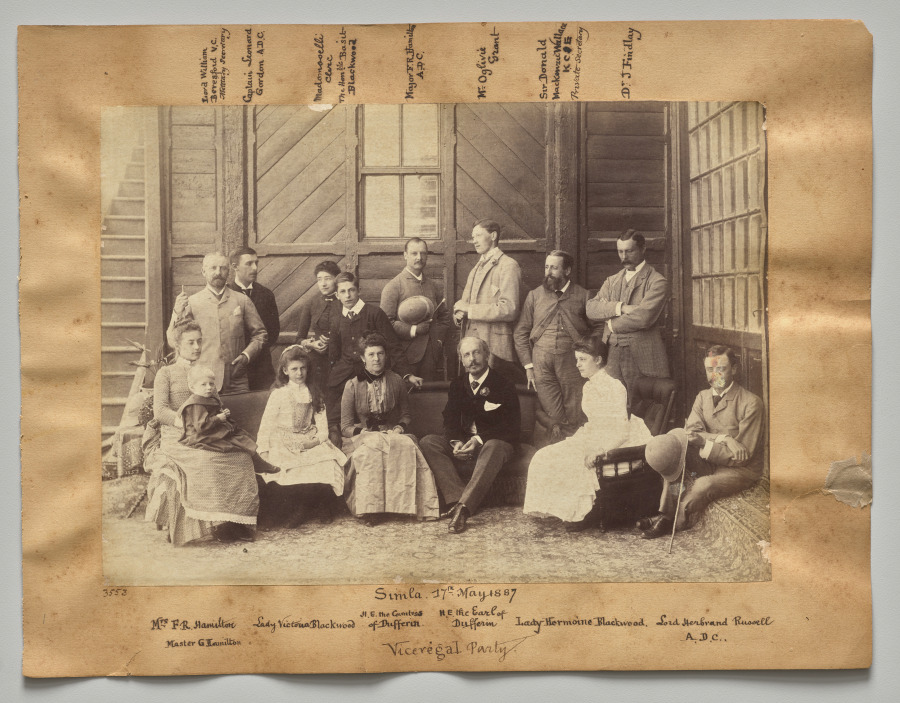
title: Shimla 17th May 1887: Viceregal party. Lord William Beresford, Military Secretary, Captain Leonard Gordon A.D.C., Mademoiselle Clerc, The Honorable Basit Blackwood, Major F. R. Hamilton A.D.C., Mr. Oglivie Grant, Sir Donald Mackenzie Wallace K.C.E., Private Secretary, Dr. J. Findlay, Mrs. F. R. Hamilton, Master G. Hamilton, Lady Victoria Blackwood, H. E. The Countess of Dufferin, H. E. The Earl of Dufferin, Lady Hermione Blackwood, Lord Herbrand Russell, A.D.C. (recto)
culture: India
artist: Raja Deen Dayal (Indian, 1844–1905)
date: 1887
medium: albumen print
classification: Photograph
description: These photographs are part of an album, now disassembled, of around 105 photographs taken in India between 1885 and summer 1887 that provide glimpses into the lives of the British colonial elite and royal and upper-class Indians. The museum holds another group of 37 pictures from this album (2016.266), which was probably commissioned by a British civil servant visiting or working in India around 1888 as a personal souvenir of his experiences there.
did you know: Raja Deen Dayal is regarded now, and was considered during his lifetime, to be India’s most important 19th-century photographer.